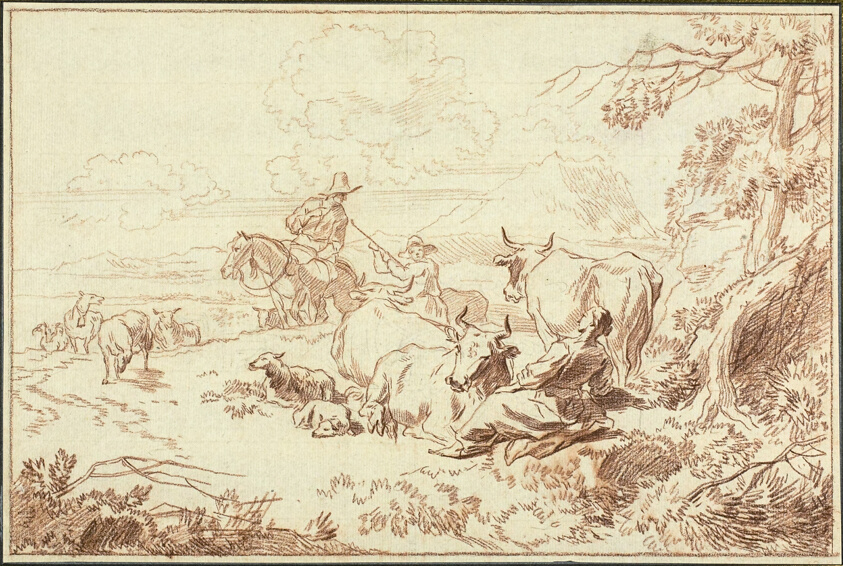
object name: Drawing and Watercolor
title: Cattle and Sheep with Shepherds and Shepherdess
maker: Abraham Jansz Begeyn (Dutch c. 1637-1697); after Nicolaes Berchem (Dutch, 1620-1683); or Dirck van den Bergen (Dutch, 1640-1695)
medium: Red chalk, over traces of graphite, on ivory laid paper, tipped onto board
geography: Holland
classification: chalk; drawings (visual works); prints and drawing